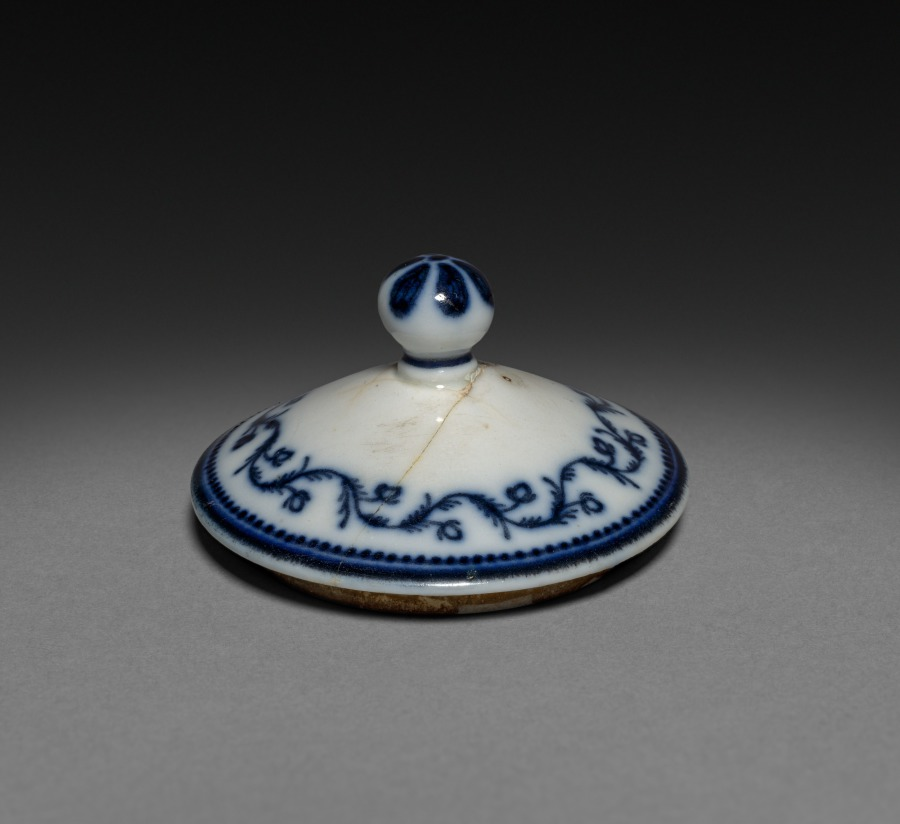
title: Pitcher (lid)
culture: France, 18th century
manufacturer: Niderviller Factory (French)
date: c. 1780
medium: hard-paste porcelain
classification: Ceramic